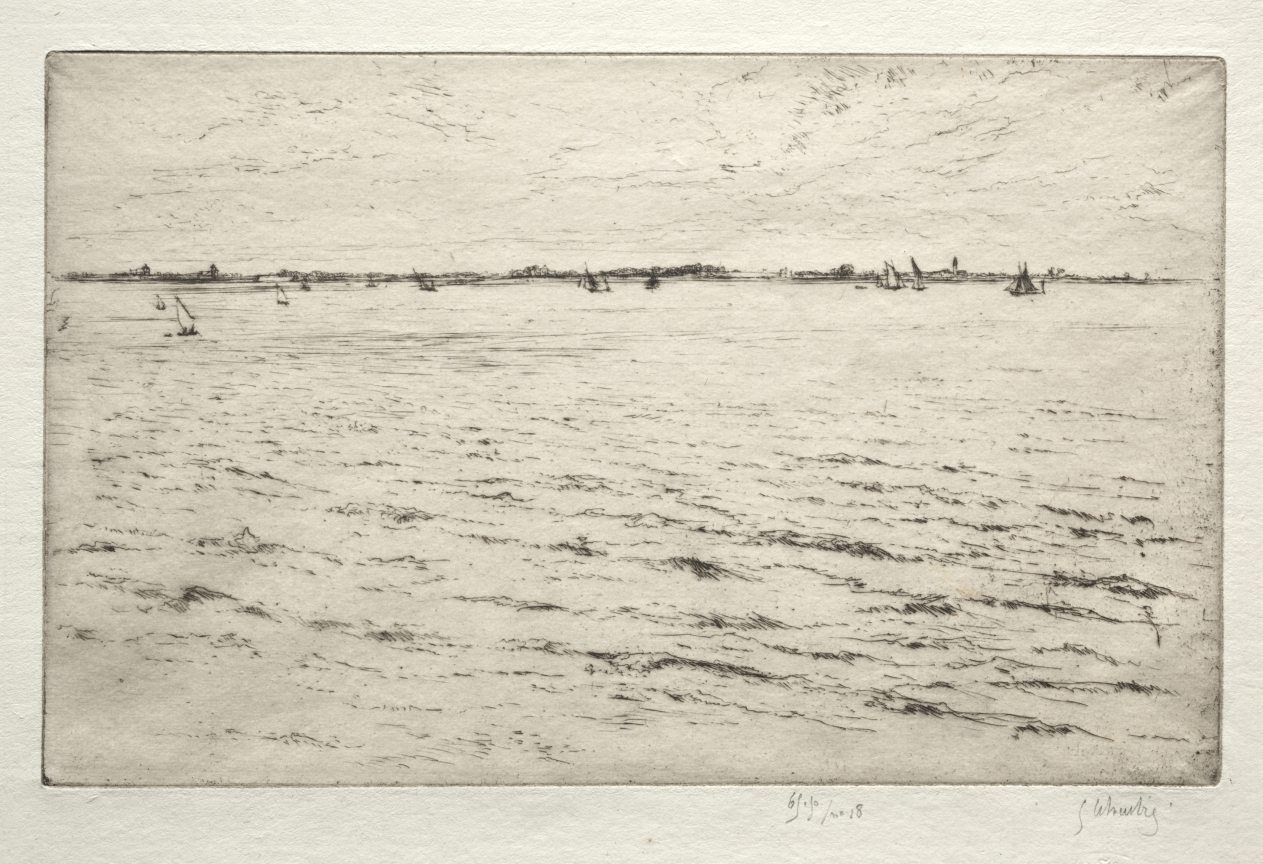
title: L. Th. de la Ris vue de la Pallice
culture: France, 19th-20th century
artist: Gustave Leheutre (French, 1861–1932)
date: c. 1880–1930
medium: etching and drypoint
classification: Print